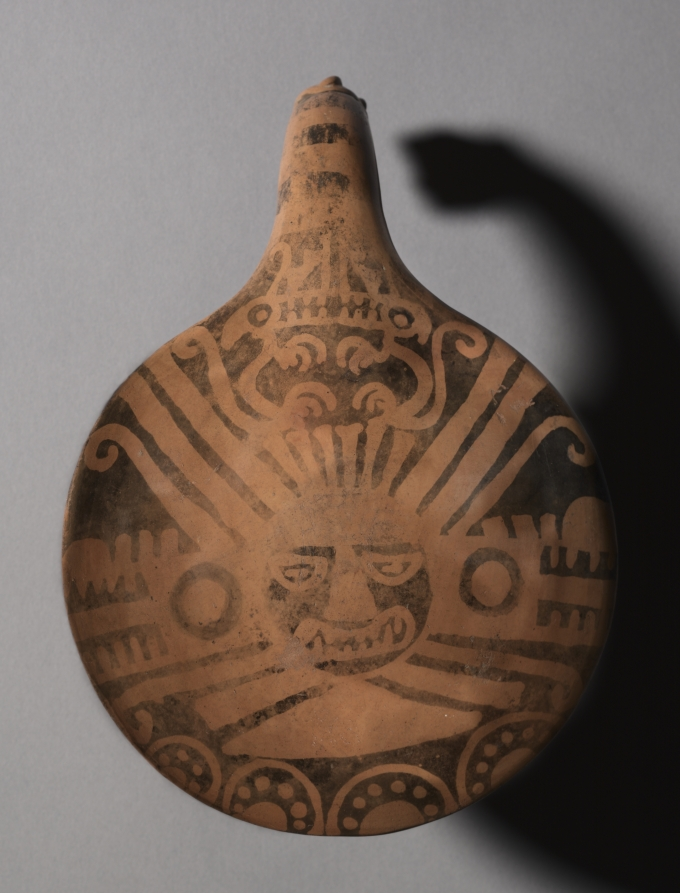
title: Dipper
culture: Peru, North Highlands, Recuay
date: 100 BCE–700 CE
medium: ceramic, slip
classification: Ceramic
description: Both of these objects feature a creature known as the "Recuay feline," although it could also refer to a fox, dog, or viscacha (a rodent). Whatever its identity, the prominent crest on its head ties it to the supernatural realm, a connection underlined by the deity head that also appears on the dipper and by the ritual function of snuff tablets, which were used to inhale hallucinogenic snuffs during religious ceremonies.